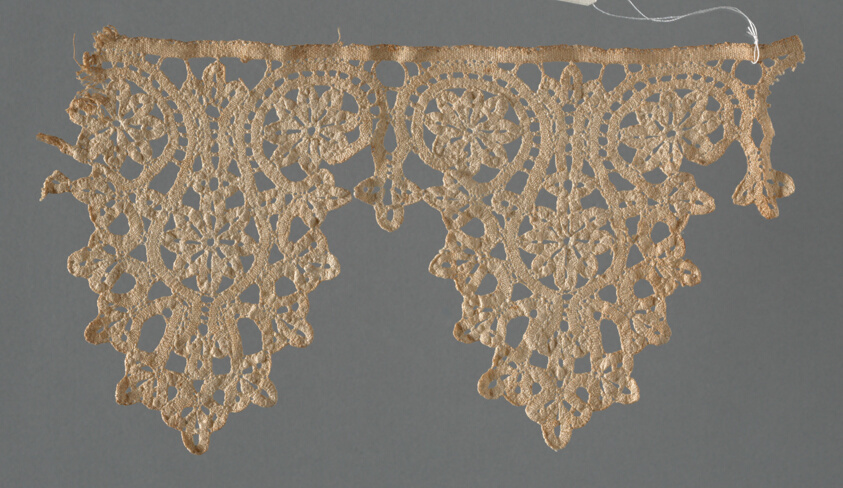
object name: Textile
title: Fragment (Border)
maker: Italy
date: 1625/50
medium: Linen, bobbin straight lace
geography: Italy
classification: textile; lace - bobbin